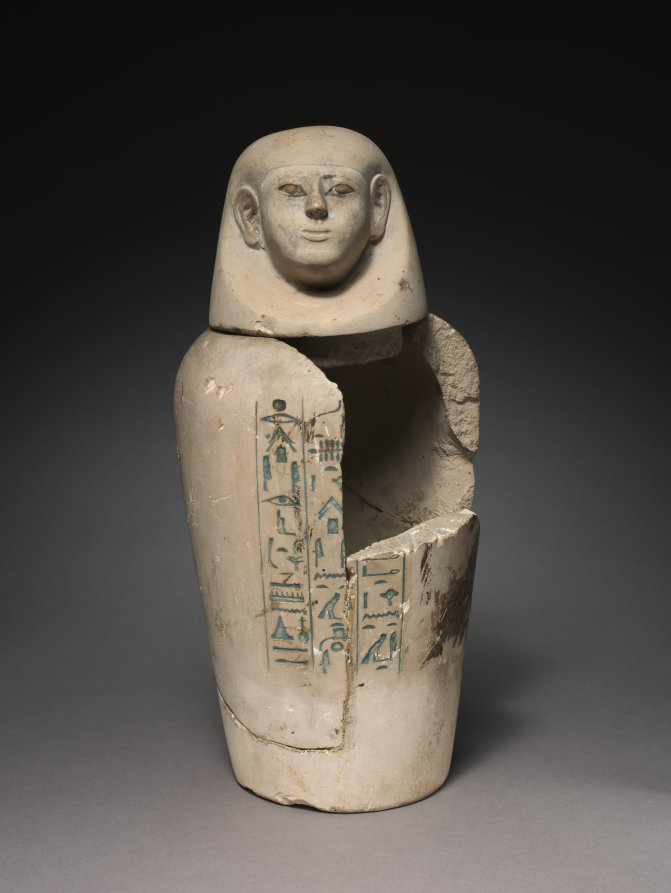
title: Canopic Jar with Lid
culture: Egypt, New Kingdom (1540–1069 BCE), Dynasty 18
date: 1540–1296 BCE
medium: limestone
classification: Funerary Equipment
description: In the process of mummification certain organs, the liver, lungs, stomach, and intestines, were removed, embalmed separately , and stored in jars known as canopic jars. Although this jar and another from the collection (1914.630) were presumably from the same individual and therefore the same set, they differ in their materials, workmanship, size, and style of inscriptions. Made of a different limestone this jar, the smaller of the two, has a lid in the form of a rather ludicrous male head. It is clearly by another hand. A sizable fragment is lost from the body. IN contrast to the poor quality of the head, the handsome inscription on the body is deeply cut and filled in with a blue pigment. It reads, "[Words spoken by Nephathys:] 'May your arms embrace that which is in you. May you protect Hapy, who is in you, and the honored one before Hapy, the Osiris, the royal herald, Gregmennefer, vindicated."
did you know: Canopic jars are named after the Greek sailor Canopus, who was said to be buried at Canopus (Abuqir) in the western delta and worshipped there in the form of a human-headed jar. It was actually a form of Osiris and had nothing to do with internal organs, but the term has stuck.